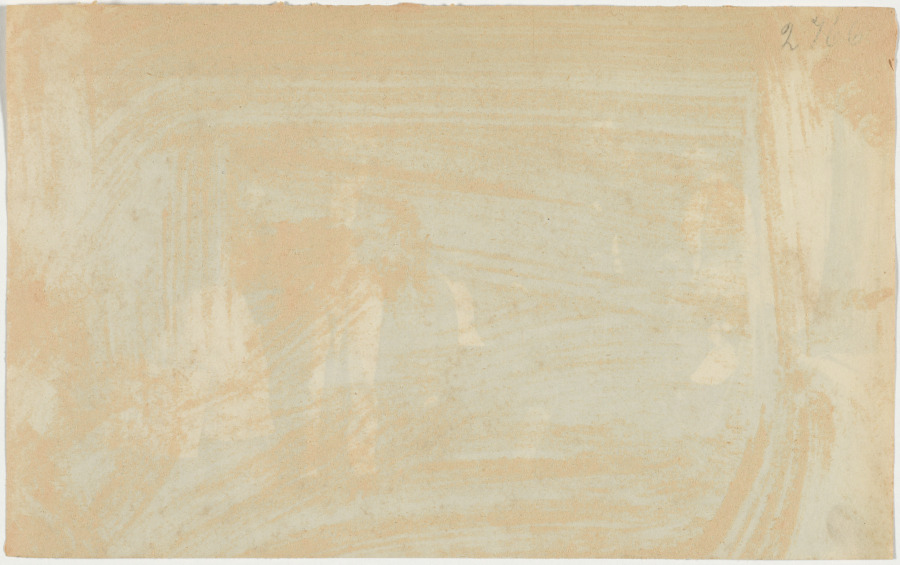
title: Fancy Group, Indore I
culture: India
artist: Raja Deen Dayal (Indian, 1844–1905)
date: 1886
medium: albumen print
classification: Photograph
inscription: Written in pencil on verso: “2766”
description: Entertainments at “fancy dress” or costume parties often included amateur theatricals or tableaux vivants—static scenes drawn from literature, history, or artworks. Here, Deen Dayal captured three moments distilled from a popular novel or play. The guests—all middle or upper class—perform as characters ranging from the working class to ladies and gentlemen. The woman holding a bucket labeled “Emma Brown of Margate” was likely playing a fishwife selling her husband’s catch. Because the photographic technology of the time required strong daylight, the photographs would have been made on a separate occasion, not at the party.